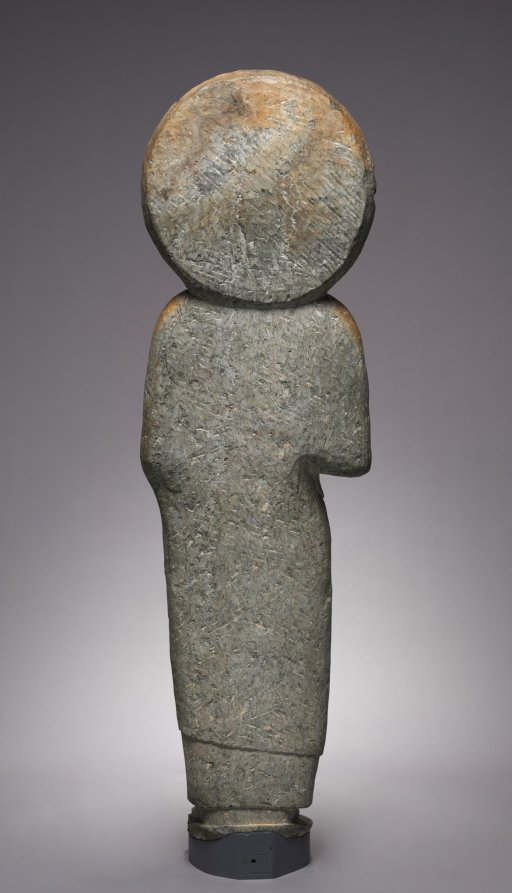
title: Standing Disciple Mahakasyapa Holding a Cylindrical Reliquary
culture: China, Hebei province, Southern Xiangtangshan caves, Northern Qi dynasty (550-577)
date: c. 550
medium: limestone with traces of pigment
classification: Sculpture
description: Mahakasyapa, the disciple of Shakyamuni, is presented with closed eyes in an expression of meditative concentration. He is holding a reliquary for the Buddha’s ashes, which symbolize the Buddha entering final spiritual attainment (nirvana) at death. The artistic simplicity exemplifies the spiritual content of this figure.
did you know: The complex of Buddhist cave temples at Xiangtangshan, “Mountain of Echoing Halls,” is a central achievement of the Northern Qi period.